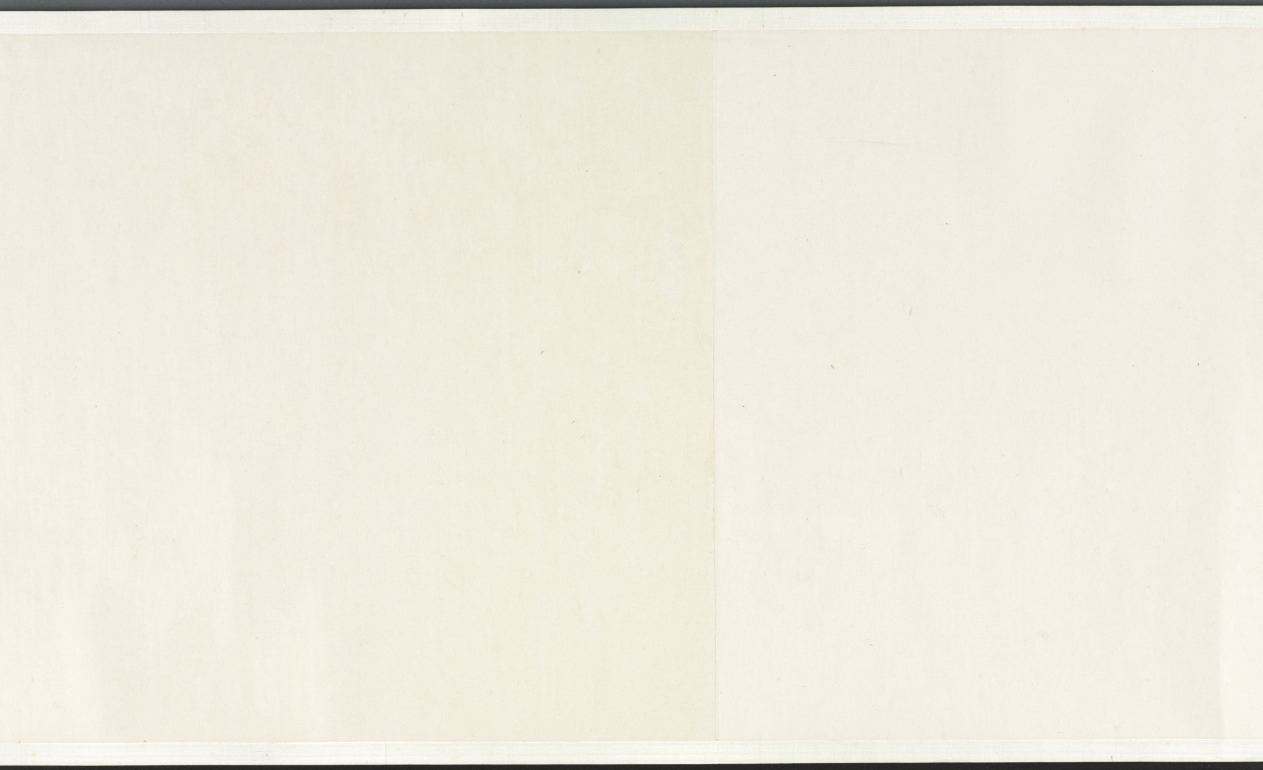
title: Buddha's Conversion of Five Bhiksu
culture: China, Yuan dynasty (1271–1368)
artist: Li Sheng (Chinese, active c. 1324–after 1375)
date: mid-1300s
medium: handscroll; ink on paper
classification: Painting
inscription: 紫篔生李升識 [印] 李氏子雲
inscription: 4 colophons and 12 additional seals: The "Heart" Sutra (Maha Prajnaparamita) text written by Wu Yuqing 吳餘慶 (active early 1400s); 2 seals of Xu Qianxue 徐乾學 (1631–1694); 3 colophons, one dated 1929 and two dated 1936, and 9 seals of Wu Hufan 吳湖帆 (1894–1968); 1 colophon, dated 1932, of Chen Dingshan; 1 seal unidentified.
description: This episode stems from the life of the historical Buddha, who, after his enlightenment, was initially hesitant about preaching his own doctrine. After much personal deliberation and prodding by deities, he finally relented. The first converts were the five guards who served him when he was still a prince. For Li Sheng, this is the pretext of the painting, which moves from the interaction of the bhiksu with the Buddha to a broader awareness of the vast surroundings of the scene.